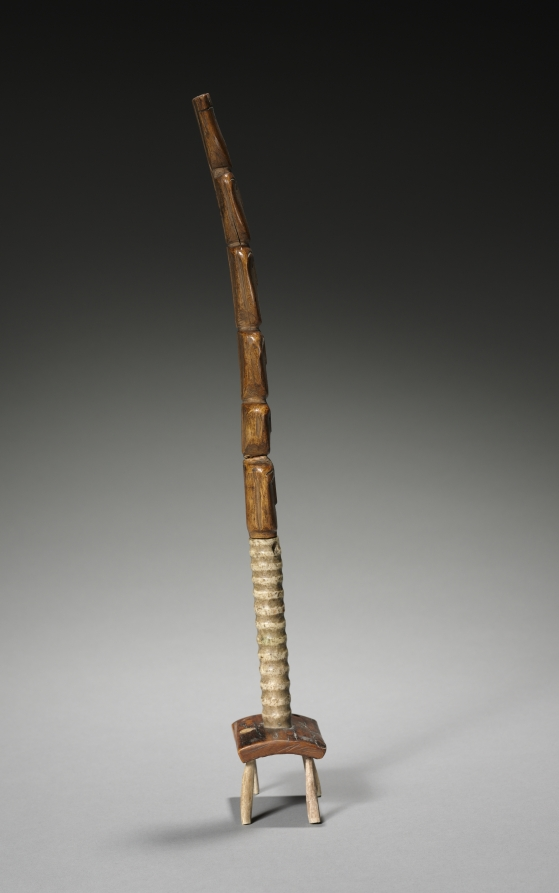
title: Totem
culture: America, North American Indian, Alaska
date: 20th century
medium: wood and bone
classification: Furniture and woodwork